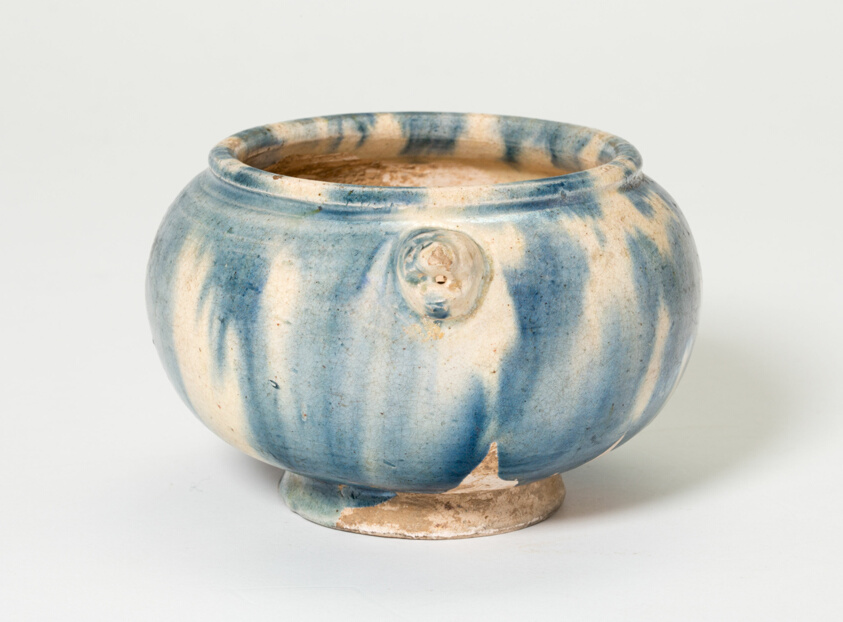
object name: Vessel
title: Jar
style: Chinese (culture or style)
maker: China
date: Tang dynasty (618–907), 8th century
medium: Slip-coated earthenware with cobalt blue streaks and underglaze molded decoration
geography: China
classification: earthenware; asian art; ceramics; vessel